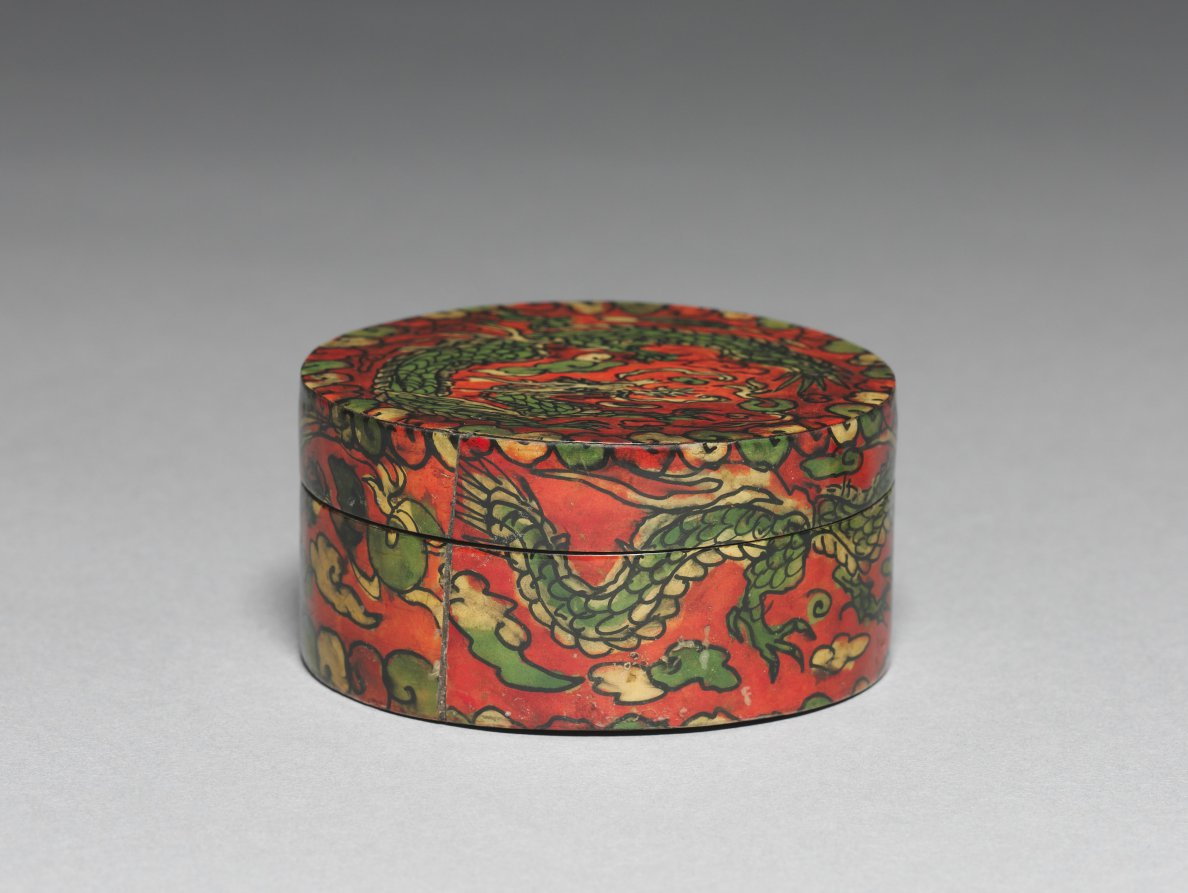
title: Incense Box with Dragon Design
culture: Korea, Joseon dynasty (1392–1910)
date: 1900s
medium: Painted wood with flattened ox-horn inlay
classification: Miscellaneous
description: This incense box is colorfully decorated with the technique of oxhorn plating. The oxhorn was cut, soaked in water, boiled, and then pressed into thin translucent sheets. Since oxhorns are usually rather small, dozens of them were required to fully decorate even a small wooden object. The lid of this container is colorfully illustrated with the imagery of a dragon amid clouds deemed as an auspicious symbol, and its side presents flying dragon and phoenix following one after another.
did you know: This box is made of small flattened pieces of oxhorn. Since oxhorn is rather small, possibly dozens of them were used to fully decorate even a small wooden object like this box.